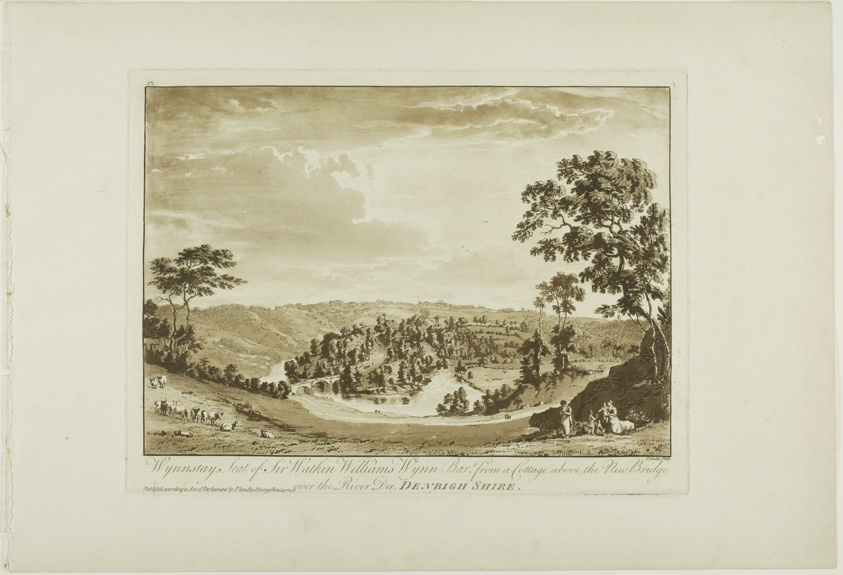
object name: Print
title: Wynnstay, Seat of Sir Watkin Williams Wynn Bart, from a Cottage above the New Bridge over the River Dee, Denbigh Shire, plate two from Twelve Views in North Wales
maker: Paul Sandby (English, 1731-1809)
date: 1776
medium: Aquatint and etching in sanguine on ivory laid paper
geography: England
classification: etching; print; prints and drawing